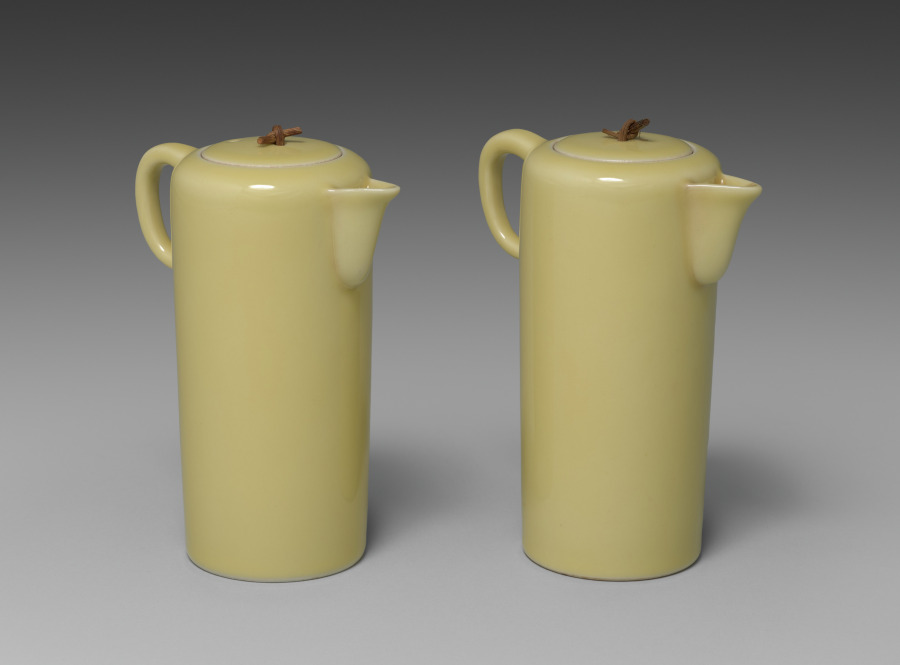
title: Sake Pourers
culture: Japan, Taishō period (1912–26) or Shōwa period (1926–89)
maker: Seifū Yohei IV (Japanese, 1872–1951)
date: 1914–46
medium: Pair of sake pourers; porcelain with yellow glaze and bamboo handles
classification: Ceramic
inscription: 清風造 。 【印】 清風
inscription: 成山清風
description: Like his father, Yohei IV also produced works with red or yellow monochrome glazes. His yellow-glazed works include this pair of sake pourers, a set of five drinking cups CMA 2022.217, and a sweets bowl molded into the shape of a chrysanthemum CMA 2022.218.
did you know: The lid's handle is made of bamboo.